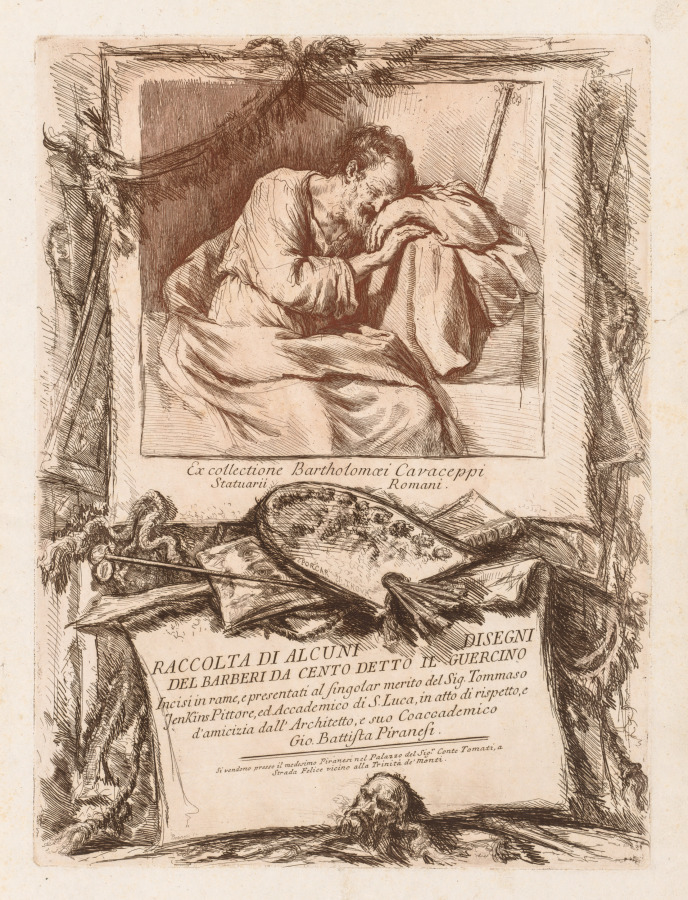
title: Title Page of Raccolta di alcuni disegni del Barberi da Cento detto il Guercino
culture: Italy, 18th century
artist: Giovanni Battista Piranesi (Italian, 1720–1778)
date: 1764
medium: etching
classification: Print